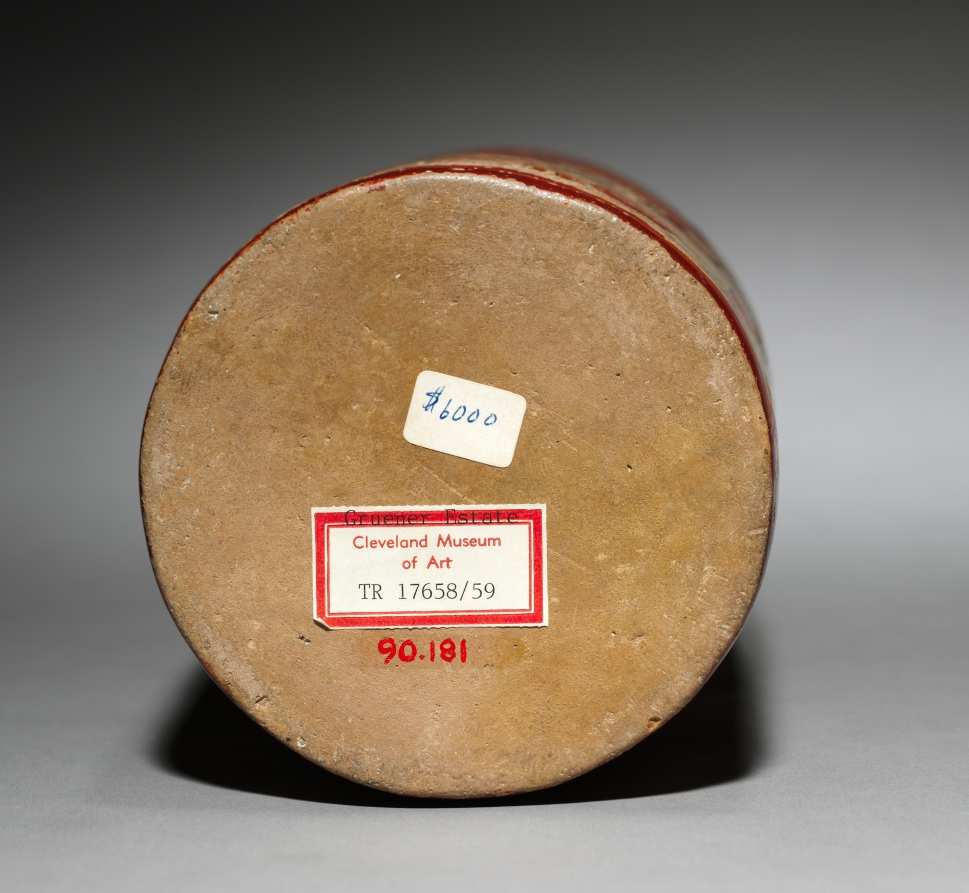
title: Painted Vase with Ruler and Scribe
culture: Guatemala, Northern Peten or Mexico, Southern Campeche, Maya, late Classic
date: 600–900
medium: pottery with burnished, colored slips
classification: Ceramic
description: Among Maya noble families, finely painted ceramic vessels were used as fancy tableware, treasured gifts that secured the support of allies, and funerary offerings placed in tombs. Accordingly, the vessels’ imagery varies from religious themes to scenes of courtly life. Here, two attendants kneel before an enthroned nobleman who wears an enormous bird-head headdress.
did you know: A string of death glyphs below the rim departs from the Primary Standard Sequence.